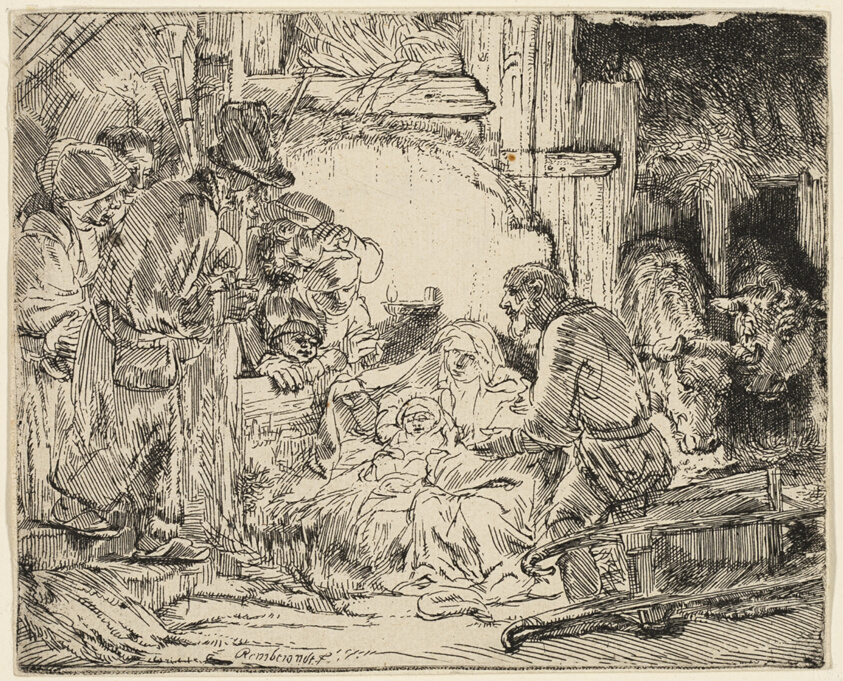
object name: Print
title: The Adoration of the Shepherds: With the Lamp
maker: Rembrandt van Rijn (Dutch, 1606-1669)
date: c. 1654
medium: Etching on ivory laid paper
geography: Holland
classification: etching; print; prints and drawing; paper